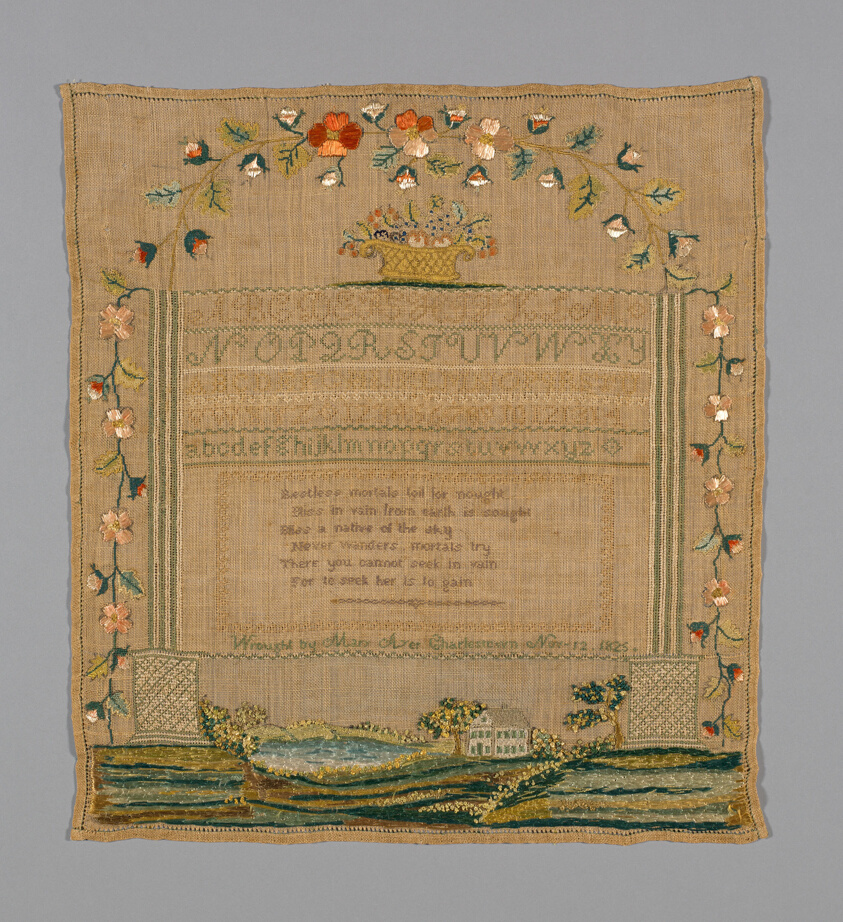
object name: Textile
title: Sampler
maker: Mary Ayer (American, active 1825); United States, Massachusetts, Charlestown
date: 1825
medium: Linen, plain weave; embroidered with silk in cross, hem, satin, split, stem, and tent stitches; French knots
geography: Massachusetts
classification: textile; needlework (visual works); sampler